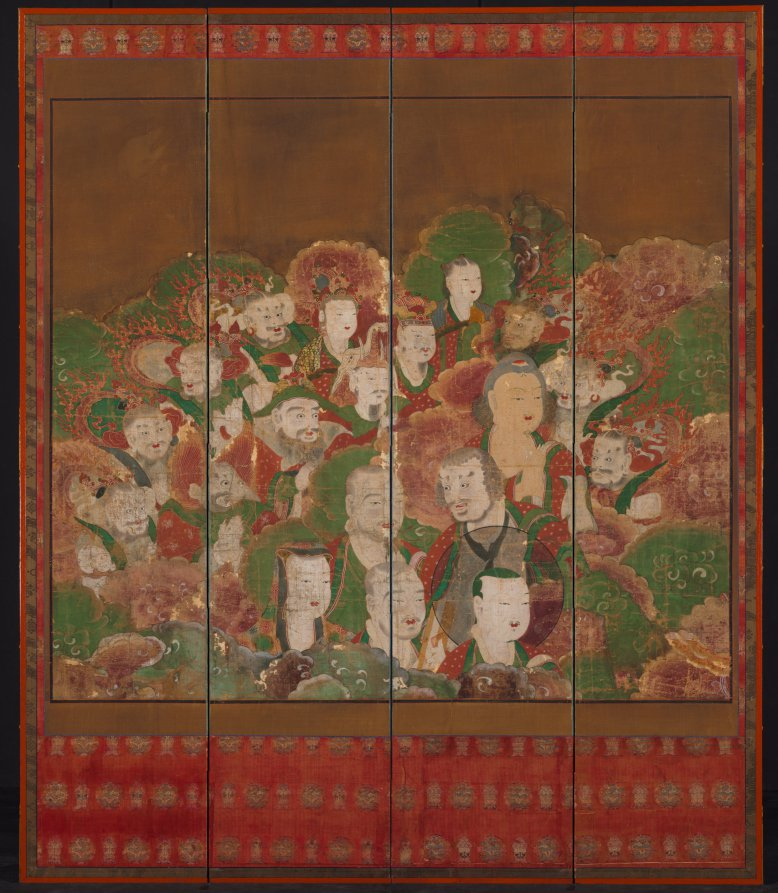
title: Buddhist Deities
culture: Korea, Joseon dynasty (1392–1910)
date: 1700s–1800s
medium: Four-panel folding screen; ink and color on silk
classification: Painting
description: This painting is a fragment of a much larger banner painting, now preserved by mounting on a four-panel continuous folding screen. On the back are Buddhist sutra pages, with text written in gold ink on indigo dyed paper.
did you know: This painting is a fragment of a much larger banner painting.